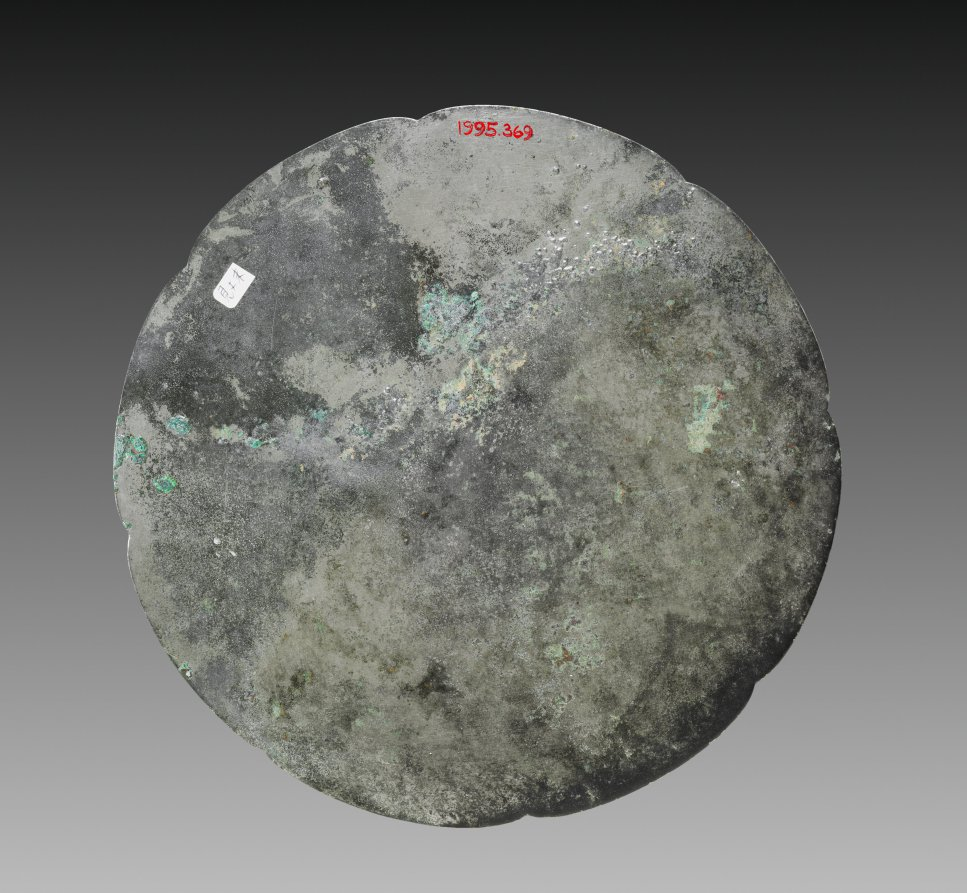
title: Lobed Mirror with a Tortoise Knob, Musician, and Phoenix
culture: China, Tang dynasty (618-907)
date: late 700s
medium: bronze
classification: Metalwork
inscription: 鳳凰雙鏡南金裝。陰陽各為配，日月恒相會。白玉芙蓉匣，翠羽瓊瑤帶。同心人，心相親，照心照膽保千春。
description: The inscription on this mirror states it was one of a pair made of metals from the south, and placed in a jade box, perhaps alluding to a wedding gift. The meaning of its design is not entirely known, but may refer to the Daoist immortal Hou Jin, who played the qin (stringed instrument), understood the language of birds, and could make predictions based on the reflections on water. The motifs of the phoenix, the pond, and the qin may all refer to the quest for immortality.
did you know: The imagery of this mirror includes a tiny turtle knob accompanied by a musician and phoenix.